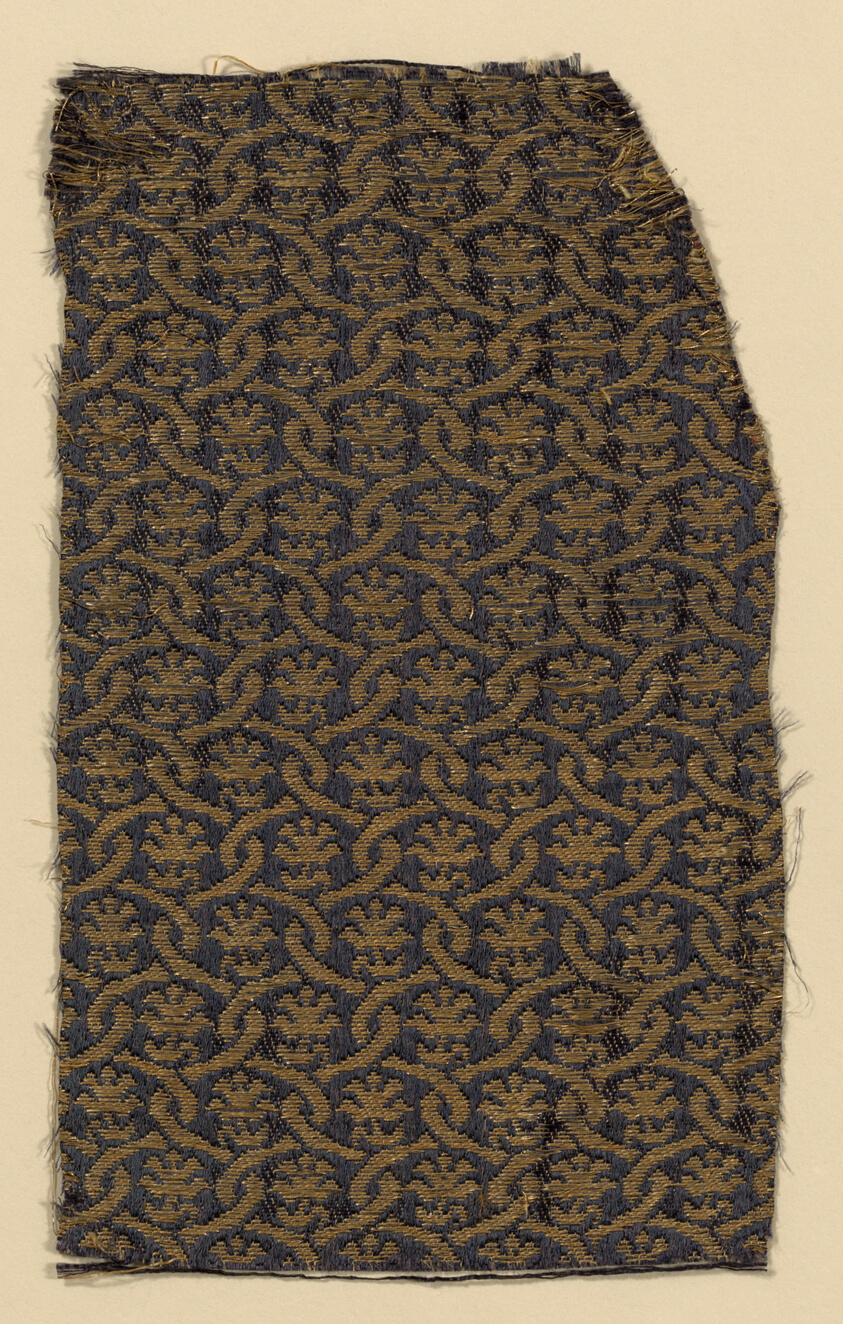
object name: Textile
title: Fragment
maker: Italy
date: 17th century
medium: Silk and gold gilt strip wound around silk fiber core, warp-float faced satin weave with supplementary patterning wefts tied by supplementary binding warps in twill interlacing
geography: Italy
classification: textile; weaving